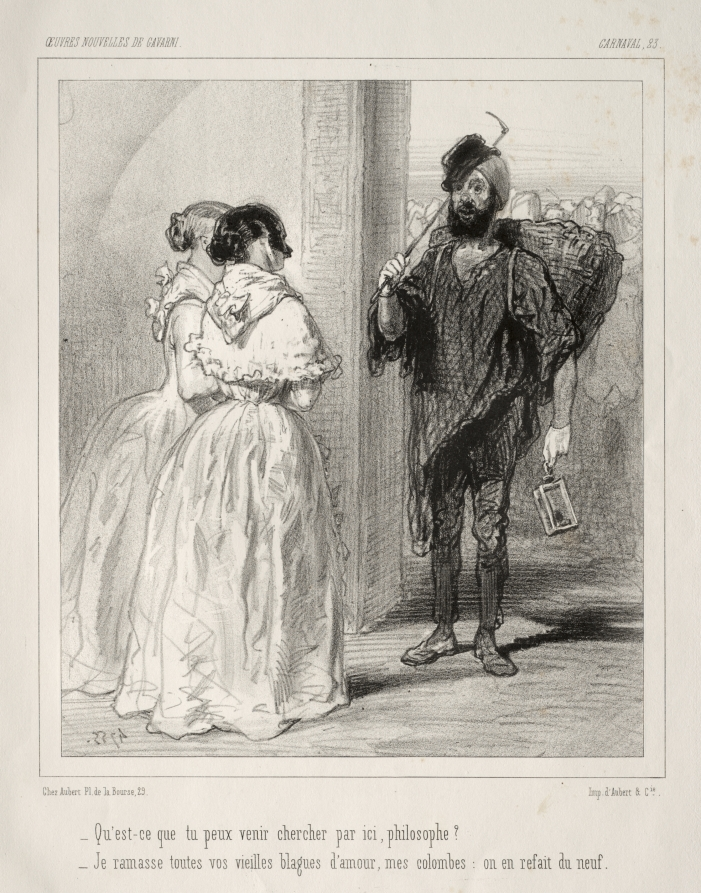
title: Carnaval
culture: France, 19th century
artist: Paul Gavarni (French, 1804–1866)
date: c. 1841–47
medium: lithograph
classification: Print